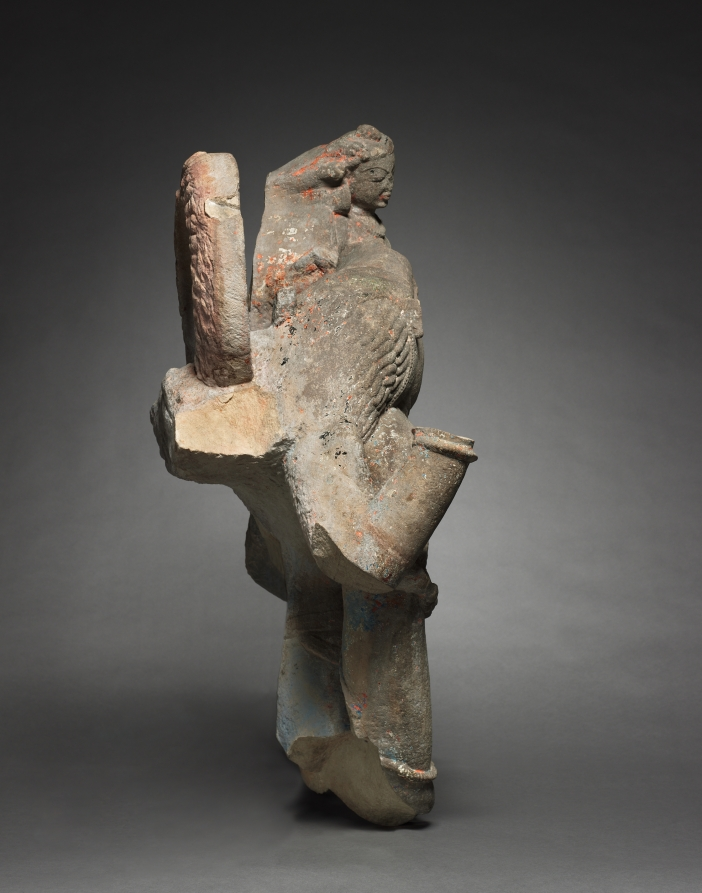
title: Varaha, Boar Incarnation of Vishnu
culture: Central India, probably Madhya Pradesh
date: 700–800s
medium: sandstone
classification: Stone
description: The Hindu god Vishnu took the form of a boar to rescue his wife Bhu (Earth in Sanskrit) from the bottom of the primordial ocean, where she had been hidden by a demon. Here shown with the head of a boar and the powerful lunging body of a warrior, Varaha holds out one of his four elbows as a seat for the earth goddess who he has rescued.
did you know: In his two left hands, he hold the conch and discus.